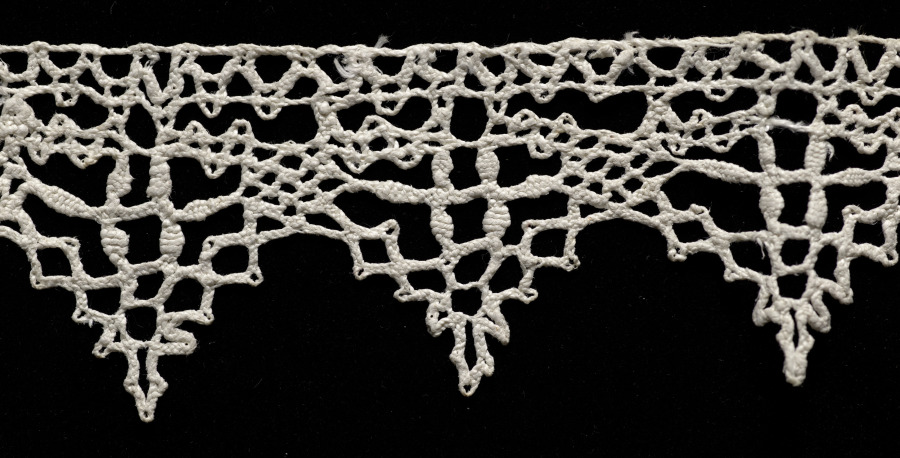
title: Lace Edging of Points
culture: Italy, Genoa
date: 1600s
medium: Bobbin lace (plaited lace)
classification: Lace